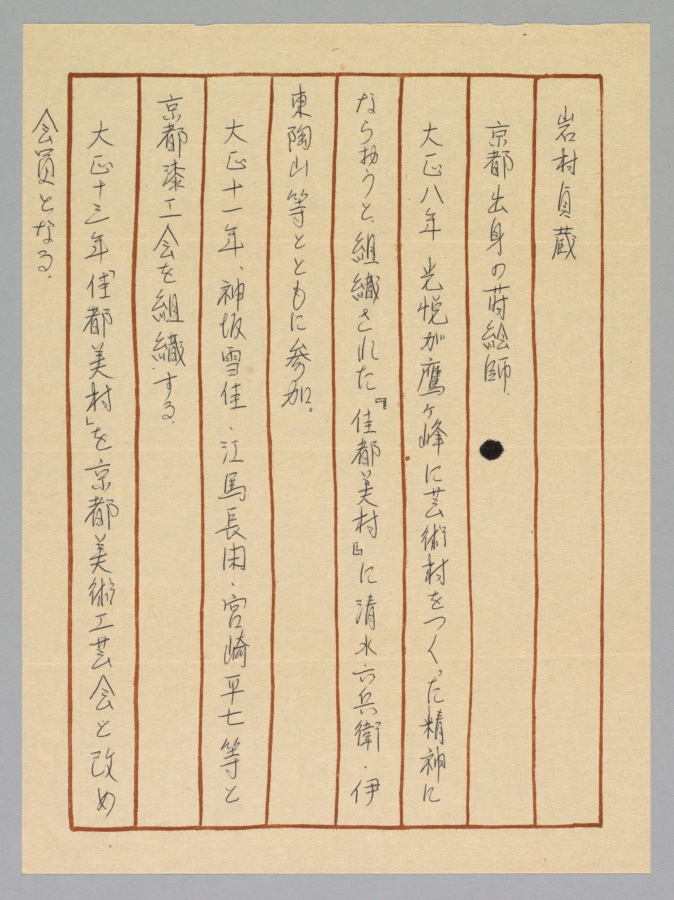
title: Poem Card Box with Lid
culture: Japan, Meiji period (1868–1912)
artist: Kamisaka Sekka (Japanese, 1866–1942)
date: 1868–1912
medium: wood with lacquer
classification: Lacquer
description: Long, decorated cards for the calligraphic presentation of poems are called tanzaku in Japanese. This box is a collaboration between the designer Kamisaka Sekka and the lacquer artist Iwamura Sadazō. Together, they crafted this box with a golden bamboo lid, and filled it with cards decorated with gold leaf designs.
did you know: Poems written on long poetry cards, or tanzaku, are often collected into albums called tekagami in Japanese.